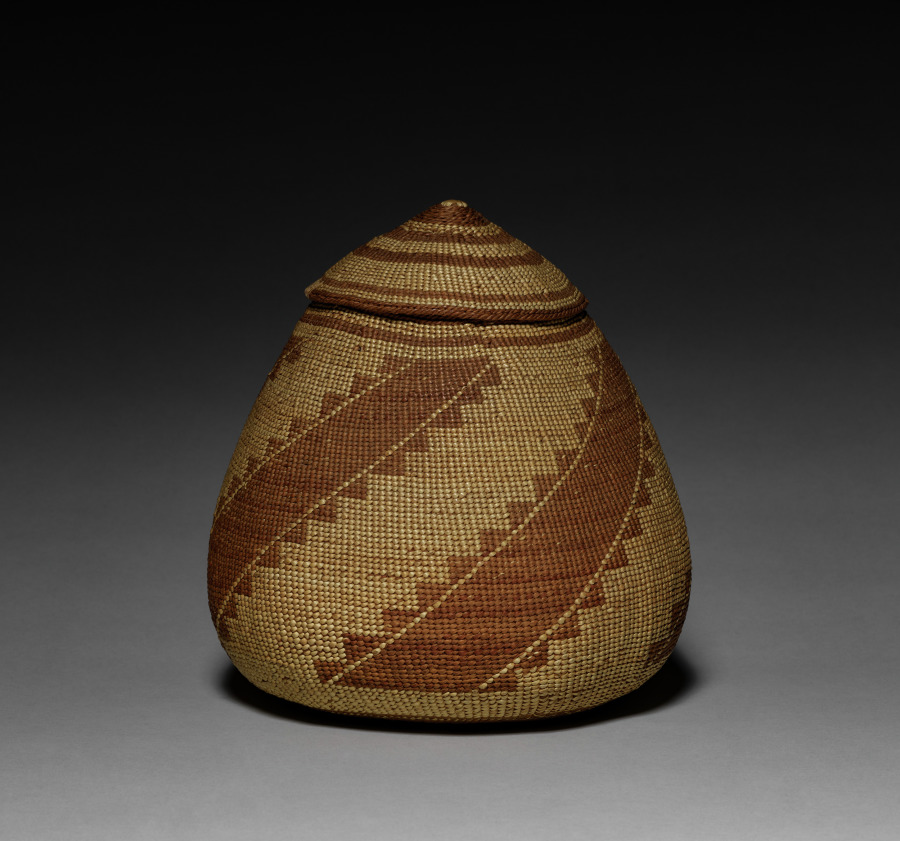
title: Tobacco Basket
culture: California, Yurok, late 19th century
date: c 1875– 1900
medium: twined grasses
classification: Basketry